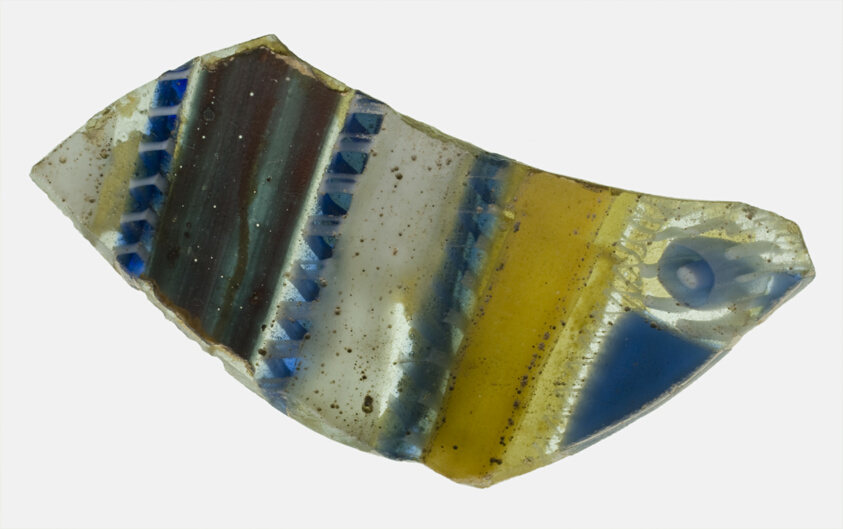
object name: Decorative Arts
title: Bowl Fragment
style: roman (ancient, style or period), ancient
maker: Roman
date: 1st century BCE-1st century CE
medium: Glass, ribbon technique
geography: Italy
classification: fragment; glass; bowl; ancient art; decorative arts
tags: decoration